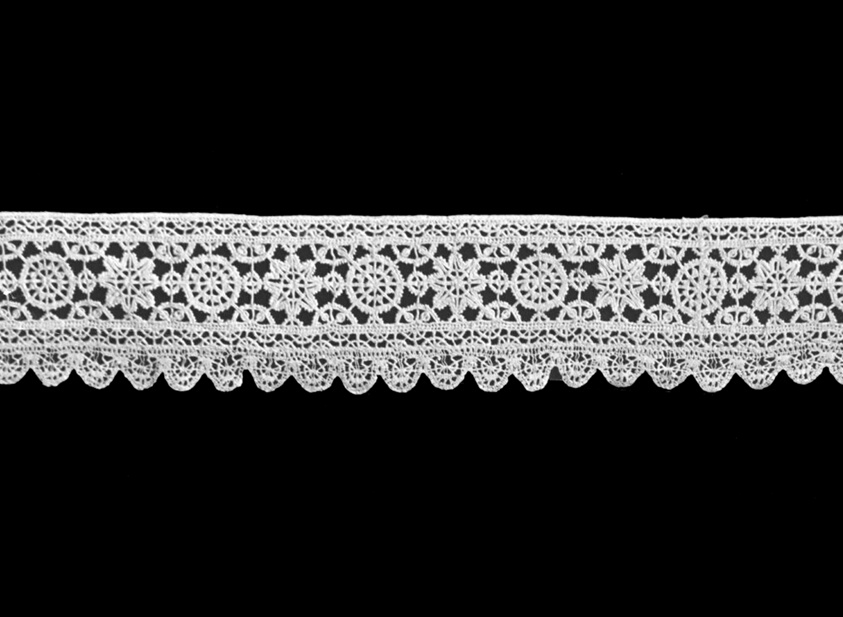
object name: Textile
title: Border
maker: Italy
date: 1675/1725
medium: Linen, needle lace worked on a plain weave; cut and drawn thread work grid; edged with bobbin straight lace (probably a 19th century addition)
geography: Italy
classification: textile; lace - mixed